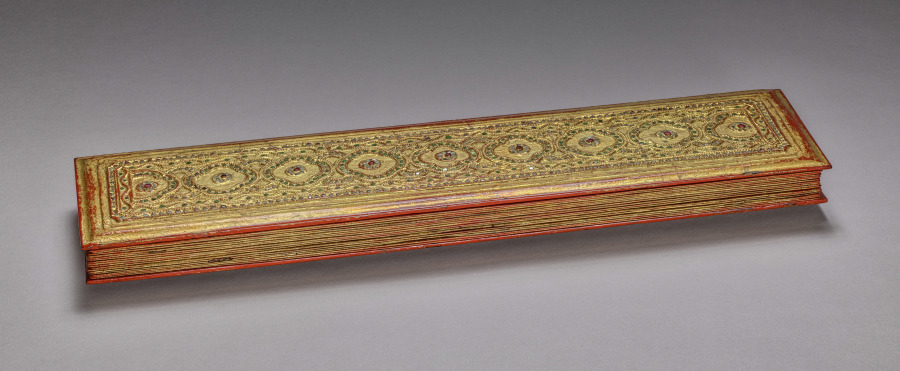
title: Kammavacha: Buddhist Ordination Text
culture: Myanmar (Burma)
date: 1800s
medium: Cover: lacquer, gilding, and glass appliqué on wood; leaves: lacquer and gilding on cloth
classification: Manuscript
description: In premodern Burma, lay people commissioned lavishly ornamented manuscripts for ceremonial occasions, when officiants would read aloud from the text. Written in black lacquer, the text is in the language of Pali written in a Burmese script. It contains ordination rites and procedures for monastic ceremonies. The second to last page is covered with intricately drawn, winged celestial beings (nats) in gestures of praise. They fly amid intertwining vegetation—denoting bounty—that grows from serpentine forms that refer to rain clouds. Lionlike forms inhabit the space with them. The top and bottom covers are equally ornamented with jeweled floral patterning.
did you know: The Pali text of this manuscript is written in Burmese square script, which is also known as "tamarind seed script."